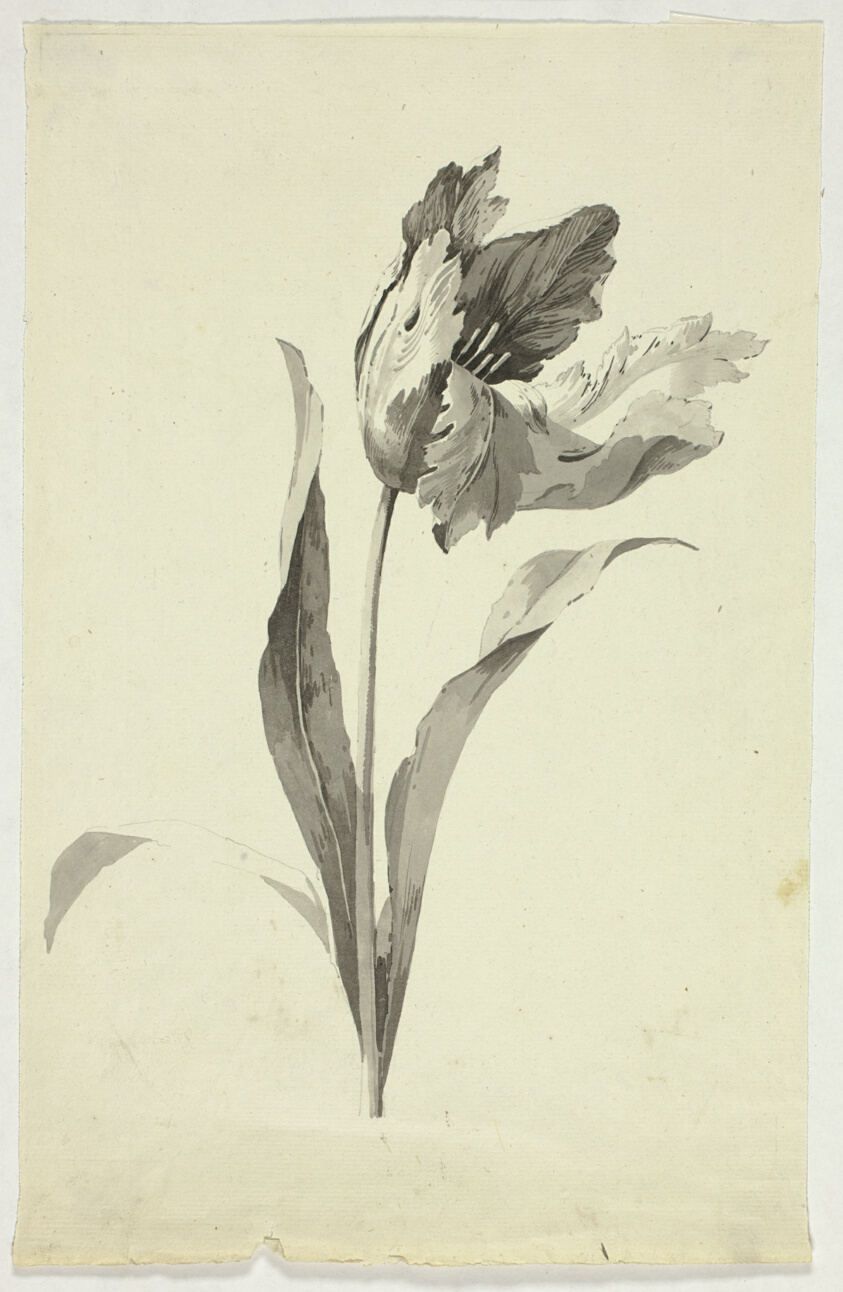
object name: Drawing and Watercolor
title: Tulip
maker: Pierre Antoine Mongin (French, 1761/62-1824/27)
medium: Brush and black ink and gray wash, over graphite, on cream laid paper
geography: France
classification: ink or chalk wash; drawings (visual works); prints and drawing